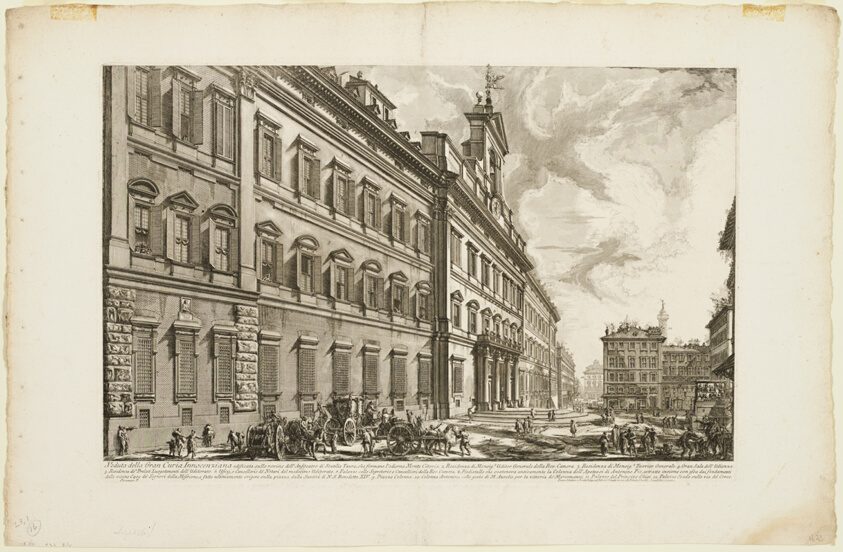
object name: Print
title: View of the Palazzo di Montecitorio, from Views of Rome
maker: Giovanni Battista Piranesi (Italian, 1720-1778)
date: 1750/59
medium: Etching on heavy ivory laid paper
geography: Italy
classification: etching; print; prints and drawing